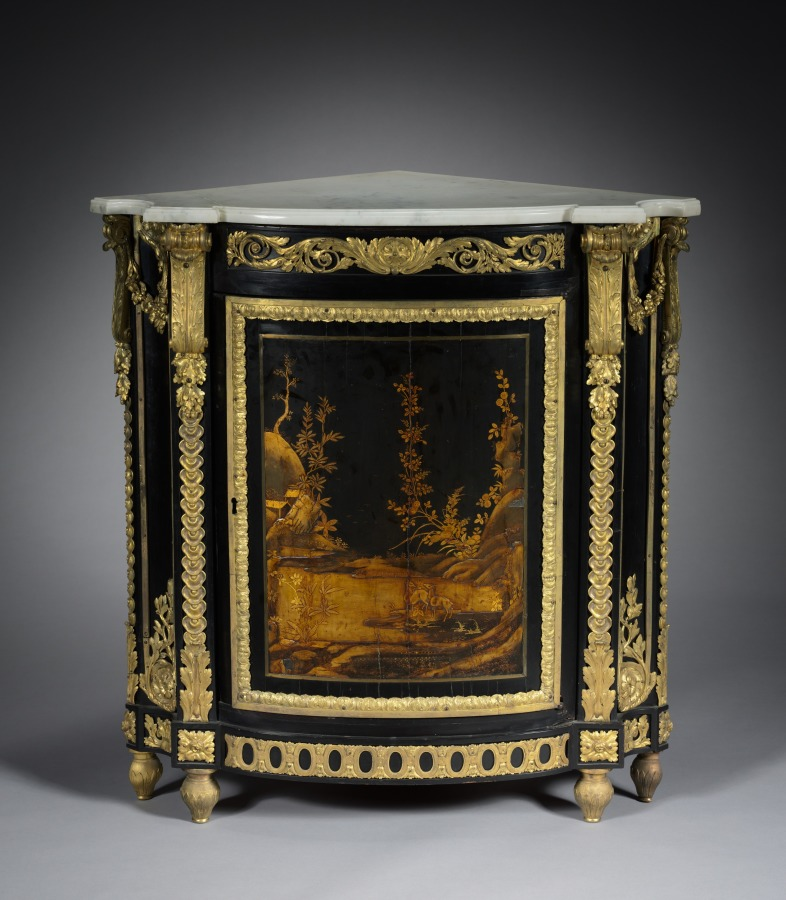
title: Corner Cabinet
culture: France, Paris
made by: René Dubois (French, 1737–1798)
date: c. 1765– 1770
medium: ebony veneer, Japanese lacquer, gilt bronze mounts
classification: Furniture and woodwork